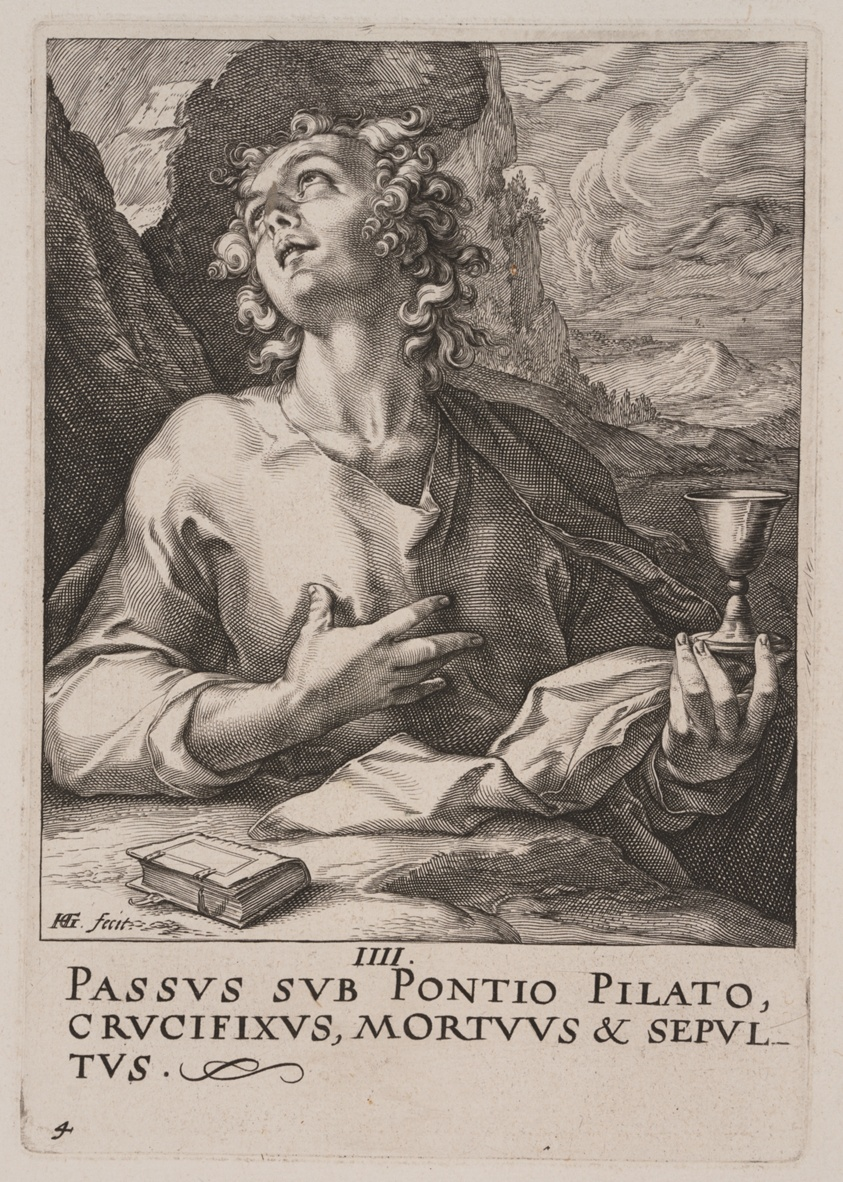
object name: Print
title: St John, from Christ, the Apostles and St Paul with the Creed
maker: Hendrick Goltzius (Dutch, 1558–1617)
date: 1589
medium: Engraving on ivory laid paper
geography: Netherlands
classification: print; paper; prints and drawing; engraving